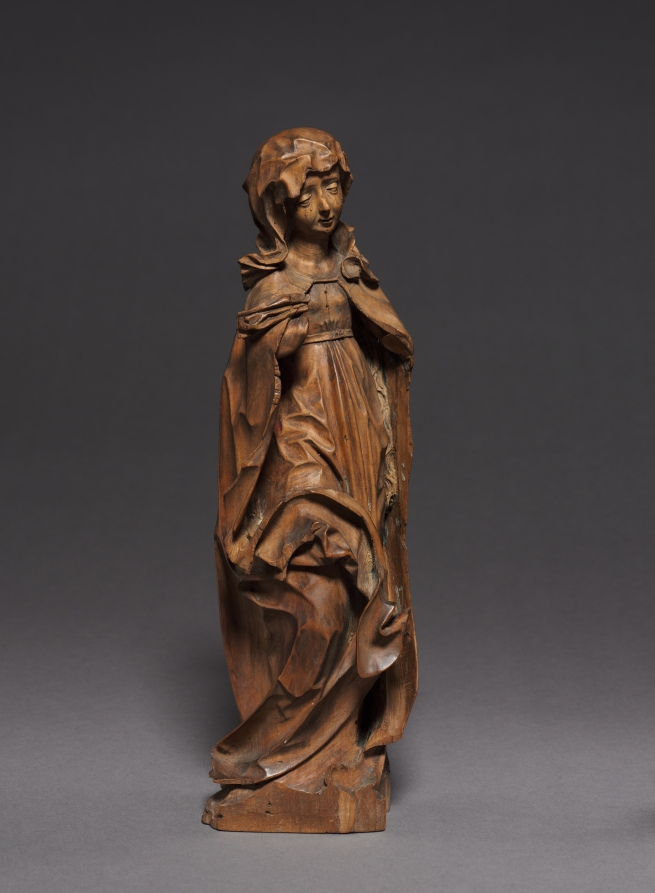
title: Mourning Virgin from a Crucifixion Group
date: about 1620/40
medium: pearwood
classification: Sculpture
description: This statuette once formed part of a Crucifixion group intended for a domestic shrine or chapel. Such ensembles were not only used for private devotion and meditation, but were also collected as works of art. This work was long attributed to the Nuremberg artist Veit Stoss. In fact, the carver imitated forms from his repertoire. However, the concave folds do not occur before 1600. The sculpture was created at a time when the appreciation for Albrecht Dürer, the most famous German painter of his time, was also experiencing a renaissance.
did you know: Looking closely, you can see that the sculptor carved tears under Mary's eyes. They show her pain over Christ hanging on the cross.